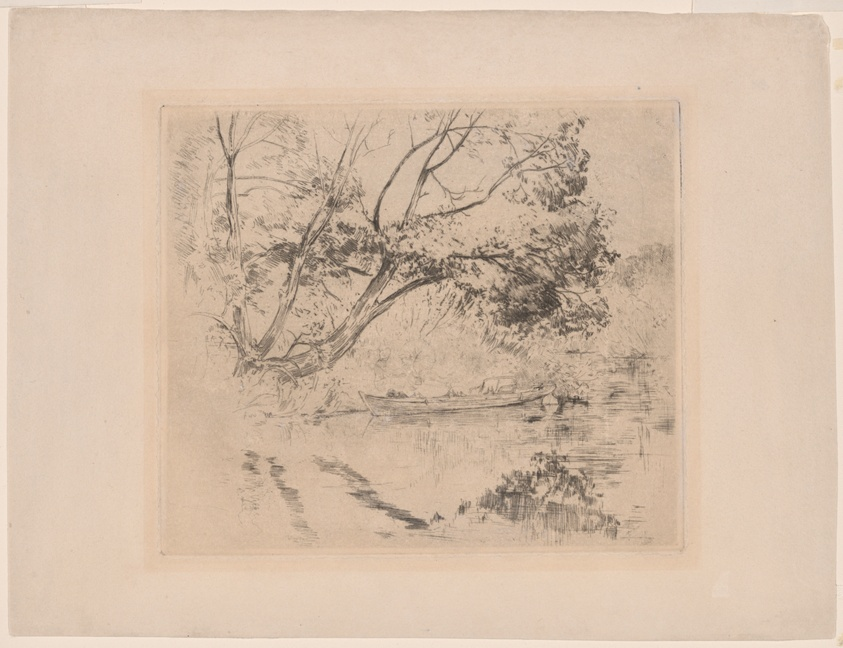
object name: Print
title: On the Thames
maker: Frank Duveneck (American, 1848-1919)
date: 1880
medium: Etching in black on buff wove paper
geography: United States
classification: prints and drawing; paper; print; etching